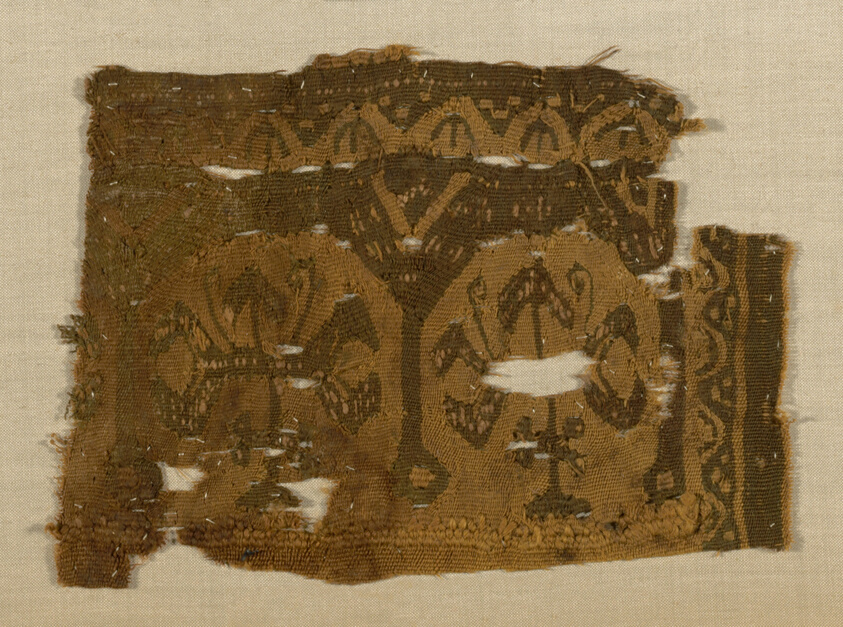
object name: Textile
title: Panel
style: roman period (egyptian)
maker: Coptic (Egypt)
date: Roman period (30 B.C.– 641 A.D.), 5th/6th century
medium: Linen and wool, tapestry weave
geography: Egypt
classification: textile; weaving